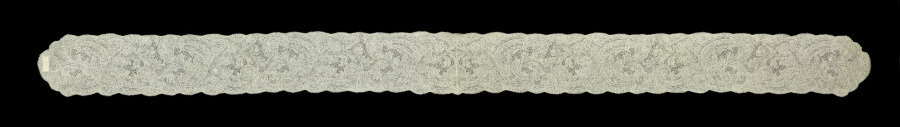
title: Lace Lappet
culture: Belgium, Binche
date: 1700s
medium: Linen: bobbin lace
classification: Lace